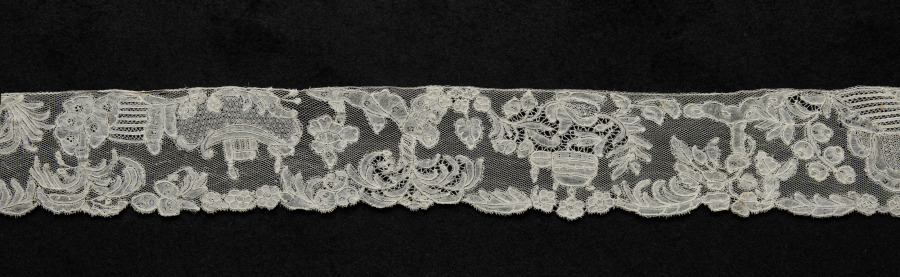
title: Lace Edging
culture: Belgium, Brussels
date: 1700s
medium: Linen: bobbin lace (Point d'Angleterre)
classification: Lace